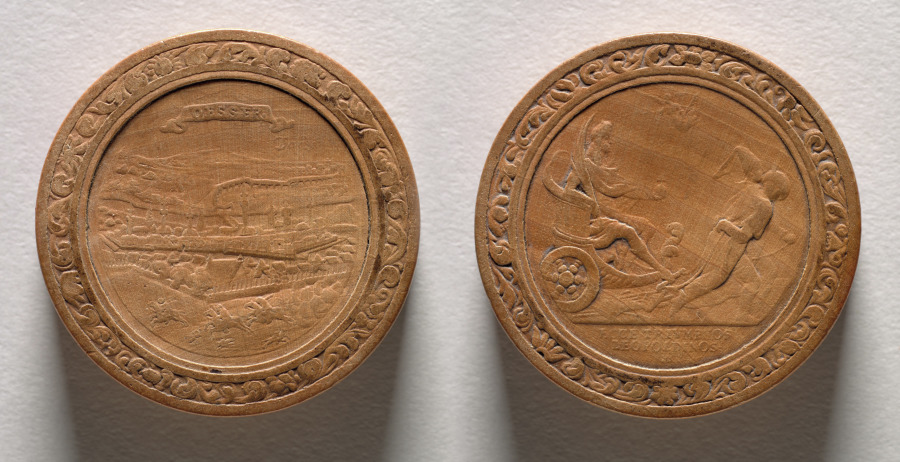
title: Gaming Piece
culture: Germany, late 17th-early 18th Century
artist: Martin Brunner (German, 1659–1725)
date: c.1700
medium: wood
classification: Furniture and woodwork